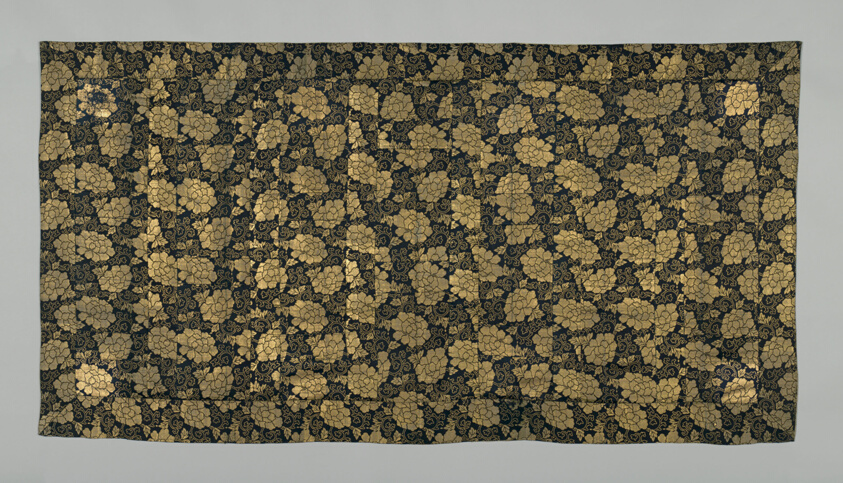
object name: Textile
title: Kesa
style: late edo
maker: Japan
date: late Edo period (1789–1868), 1801/44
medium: Silk and gold-leaf-over-lacquered-paper strip, satin weave with plain interlacings of secondary binding warp and patterning wefts; lined with silk, plain weave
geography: Japan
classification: textile; liturgical - buddhist; weaving